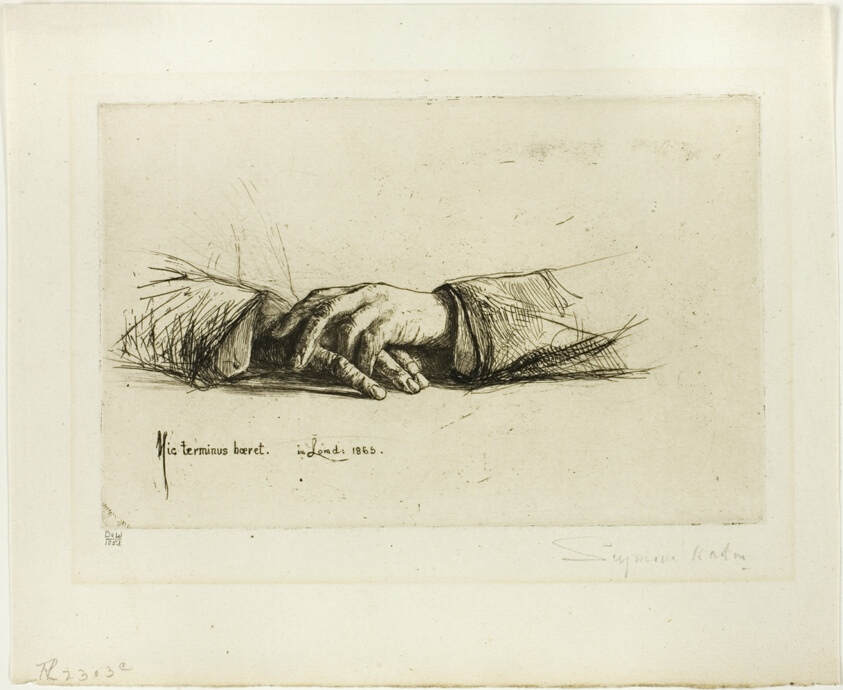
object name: Print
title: Hands Folded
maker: Francis Seymour Haden (English, 1818-1910)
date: 1865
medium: Etching with drypoint on ivory laid paper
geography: England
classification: etching; print; prints and drawing